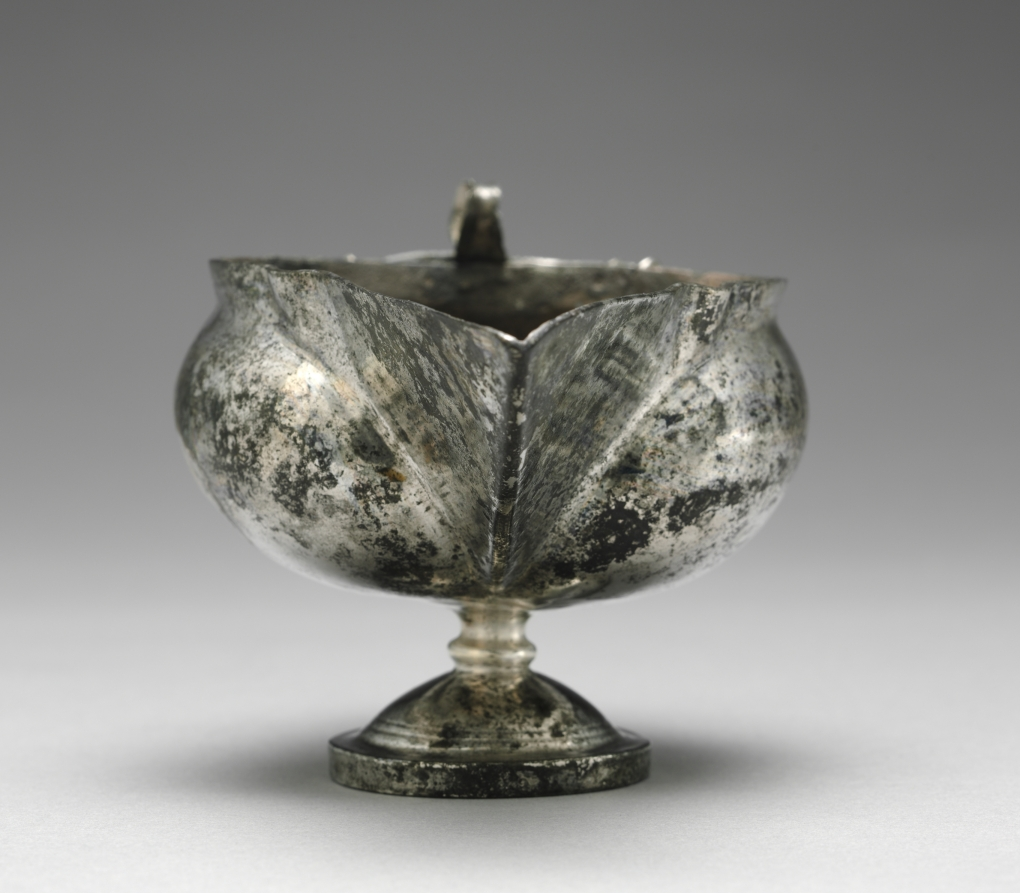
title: Spouted Pitcher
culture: Byzantium, Syria(?), Byzantine period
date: 300–600 CE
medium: silver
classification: Metalwork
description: A large quantity of tableware survives from the Roman Empire, including this piece from Antioch and the Eastern Mediterranean. Most of the recovered groups of silver seem to have been hoards concealed during times of trouble. A complete table service, called a ministerium in Latin and a synthesis in Greek, consisted of silver for eating and drinking: trays, platters, plates, dishes, spoons, pepper dispensers, goblets, pitchers, ladles, and bowls. The god of wine, Dionysos, was frequently depicted on drinking and eating vessels.